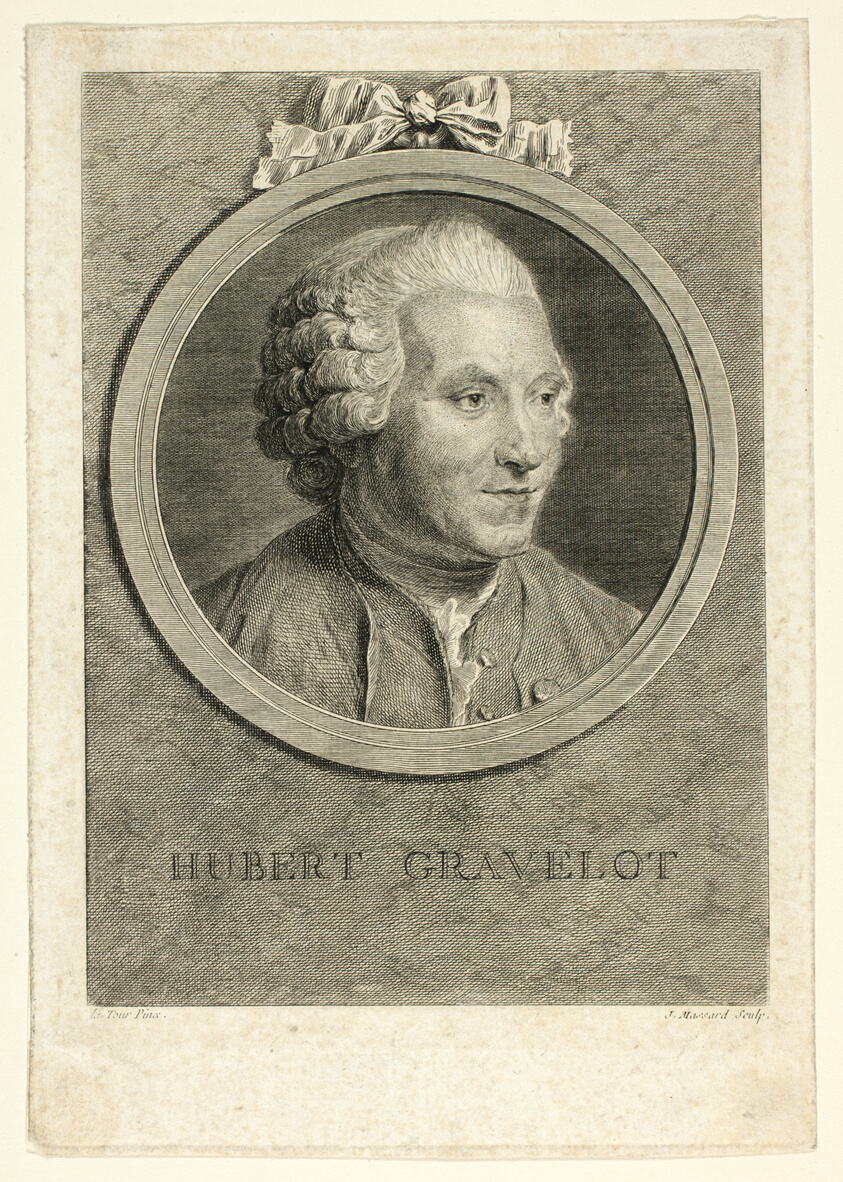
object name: Print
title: Portrait of Hubert Gravelot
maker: Jean Massard (French, 1740-1822); after Maurice Quentin de Latour (French, 1704-1788)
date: 1760/1822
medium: Engraving and etching, with roulette, on ivory laid paper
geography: France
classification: etching; print; prints and drawing